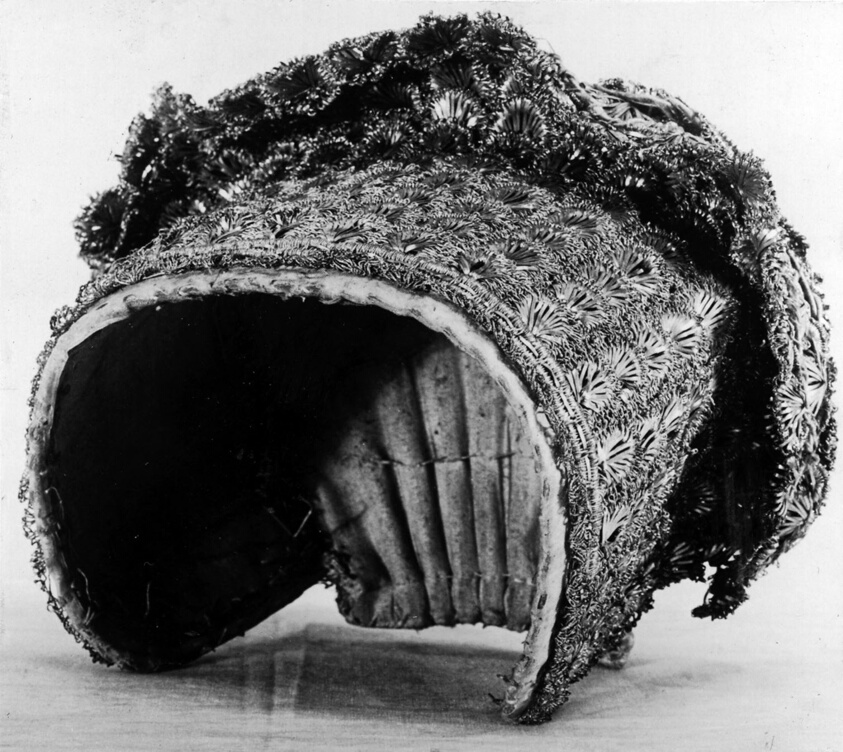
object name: Costume and Accessories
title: Headdress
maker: Austria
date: 19th century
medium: Silver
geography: Austria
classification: textile; headdress - misc; costume accessory - headdress; costume accessory; costume; dress (garment); clothing